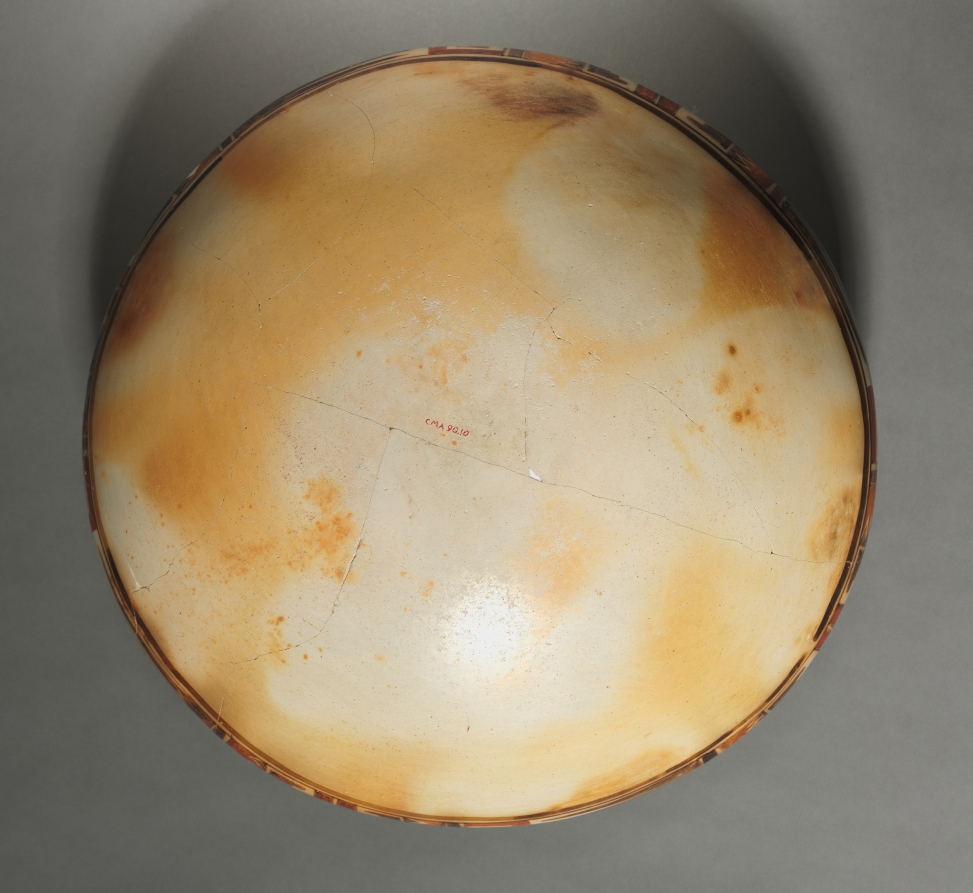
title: Jar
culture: Native North America, Southwest, Ancestral Pueblo, Sikyatki style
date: 1400–1600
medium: Ceramic, slip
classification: Ceramic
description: Ancient Sikyatki ceramics are noted for their large, distinctive shapes, meticulously stone-polished surfaces, thin walls that “ring” when tapped, and wide variety of reds and oranges, a contrast to earlier preferences for black and white. These artistically and technically inventive vessels are ancestral to modern Hopi ceramics, having developed in the area where Hopi communities live today. The Hopi regard a mottled orange color as a sign that the pot emerged from firing with life and spirit; the vessel’s “voice” is a bell-like tone that tapping produces. Such concepts likely have roots in the ancient past.